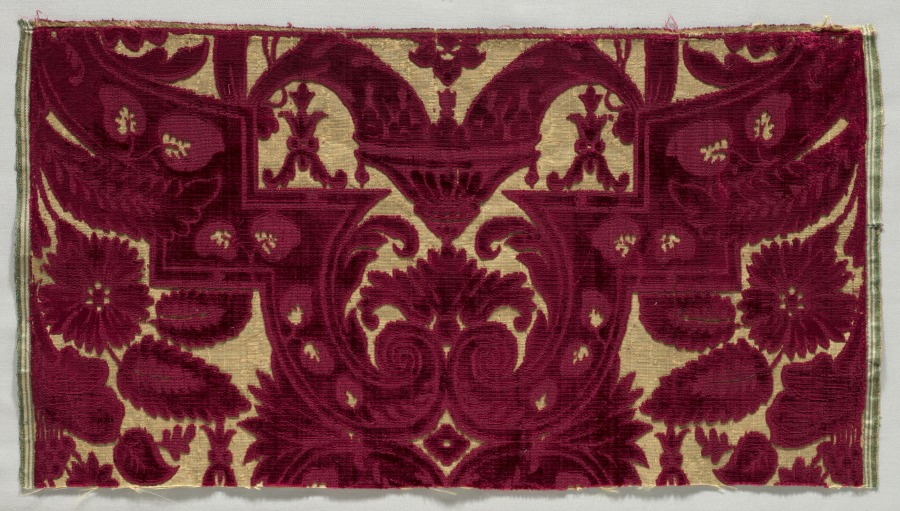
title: Velvet Fragments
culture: Italy, Genoa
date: 1600s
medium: velvet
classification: Velvet